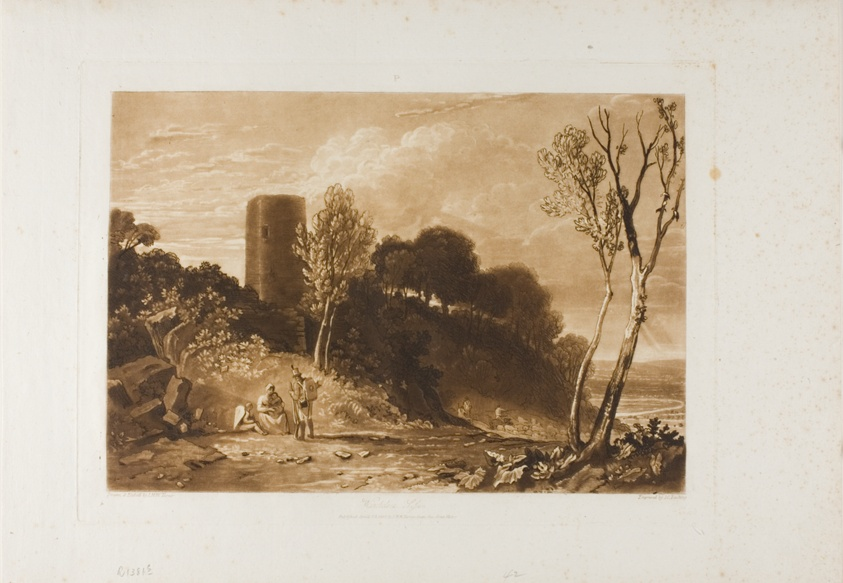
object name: Print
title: Winchelsea, Sussex, plate 42 from LIber Studiorum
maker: Joseph Mallord William Turner (English, 1775-1851); Engraved by I. C. Easling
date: published April 23, 1812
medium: Etching and engraving in brown on ivory laid paper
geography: England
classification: etching; print; prints and drawing